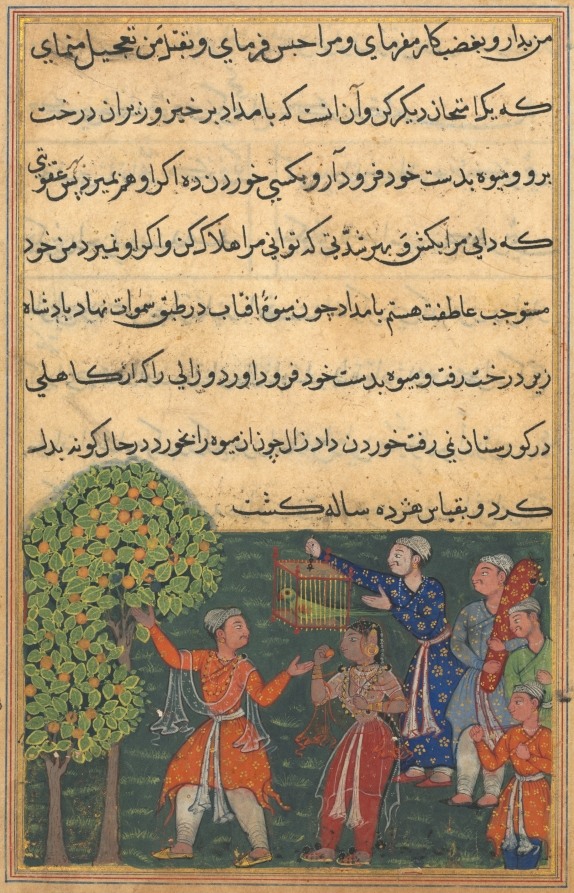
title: The king plucks fruit from the Tree of Life with his own hands and feeds it to a lady, from a Tuti-nama (Tales of a Parrot): Ninth Night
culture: Mughal India, court of Akbar (reigned 1556–1605)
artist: Suraju (Indian)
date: c. 1560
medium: gum tempera, ink, and gold on paper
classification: Painting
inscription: [su]rjū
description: In order to prevent his own execution, the loyal parrot must prove to the king that the fruit of the Tree of Life is not poisonous. When the fruit restores the youth of an old man, the parrot is vindicated. He watches from his cage, alongside other members of the court, as the king happily picks from the tree.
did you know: Black pom-poms on the woman's shoes, braid, and jewelry indicate the ends of ties.